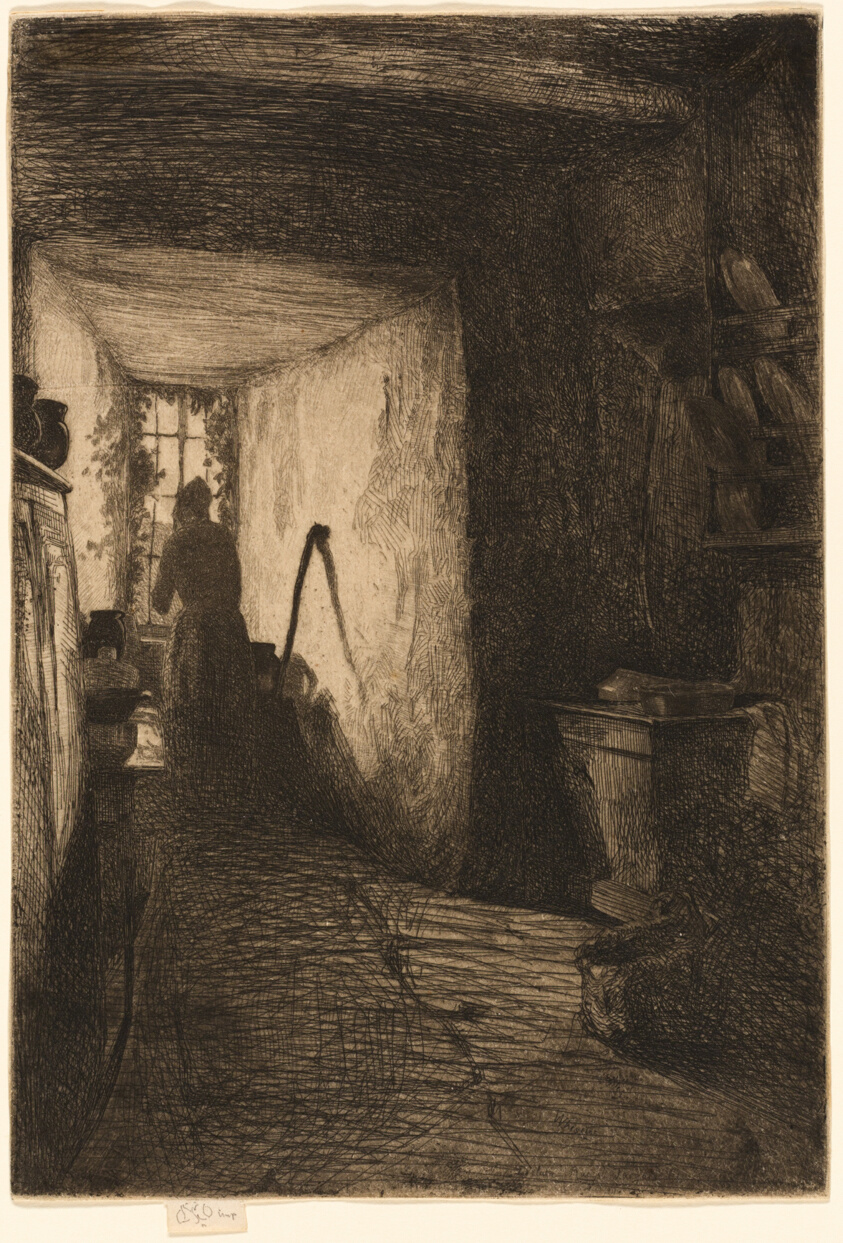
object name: Print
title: The Kitchen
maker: James McNeill Whistler (American, 1834-1903)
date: 1858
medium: Etching in black on cream laid paper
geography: United States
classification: etching; paper; print; prints and drawing